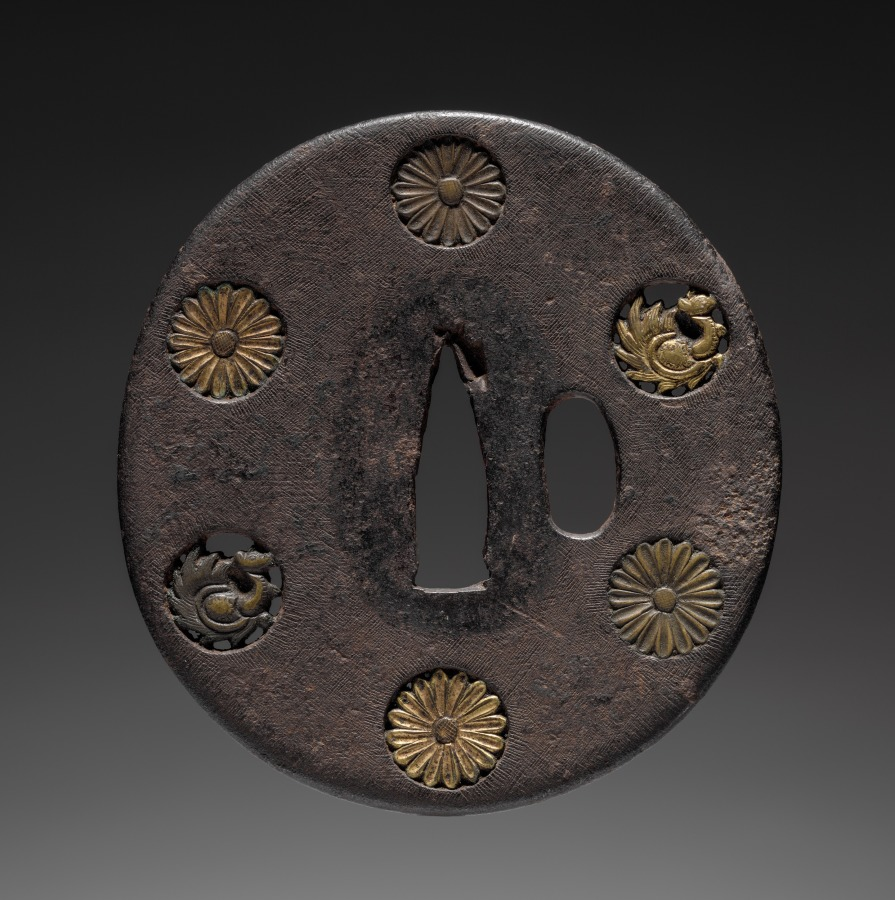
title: Sword Guard (Tsuba) with Tortoises and Chrysanthemums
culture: Japan, possibly Edo period (1615-1868)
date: c. 1615–1868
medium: iron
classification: Arms and Armor